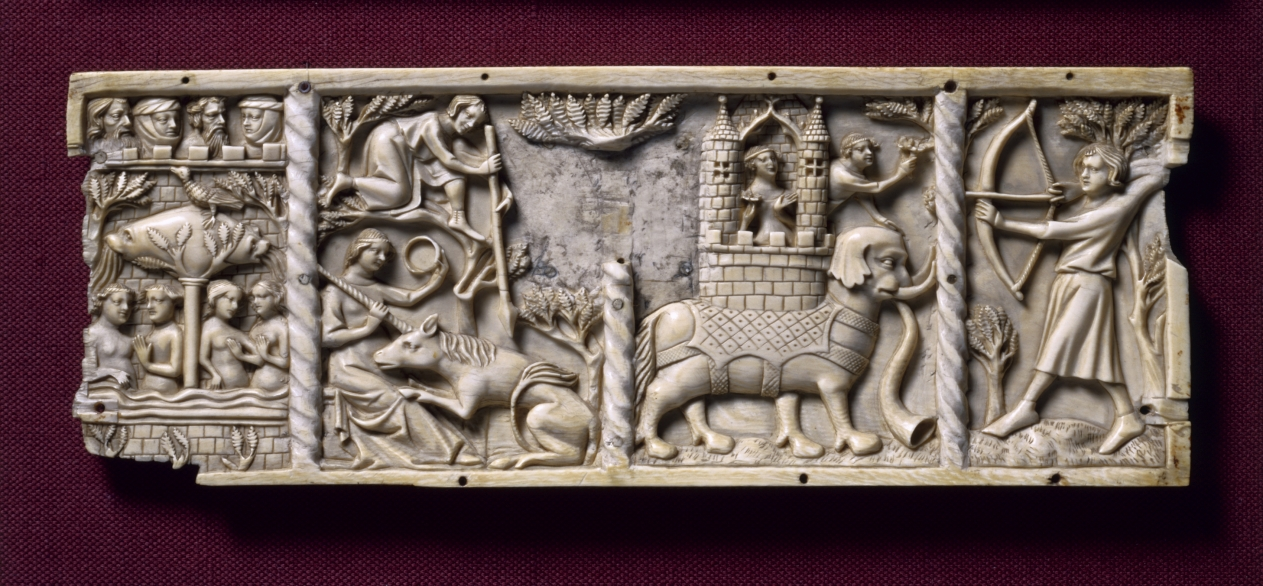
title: Set of Three Panels from a Casket with Scenes from Courtly Romances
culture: France, Lorraine?, Gothic period, 14th century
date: c. 1330–50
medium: ivory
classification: Ivory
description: Among the most lavish and deluxe products of French ivory workshops of the 1300s were large caskets carved with elaborate scenes drawn from courtly romances. The panels shown here come from such a casket. The largest panel (center) once formed the lid and depicts a tournament, the most splendid and romantic of knightly activities. Just to the right is a favorite allegory of chivalric love: knights assaulting the castle of love. The two side panels depict other scenes such as the fountain of youth, Sir Gawain and the Lion, and Lancelot crossing the sword bridge. These images suggesting chivalry, fertility, virginity, youth, and an idealized courtly love likely derive from manuscripts including the Roman de la Rose and the poems of Chrétien de Troyes. Such texts were often found within the libraries of the aristocracy, so the casket’s symbolic images would have been readily understood. Such caskets may have originally been gifts between a man and a woman. The expense of the material, ivory, suggests they were produced for an elite, aristocratic clientele.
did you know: In the center panel two knights in mail surcoats and helms joust here with blunted lances "for courtesy," a version of the joust known as the Joust of Peace.